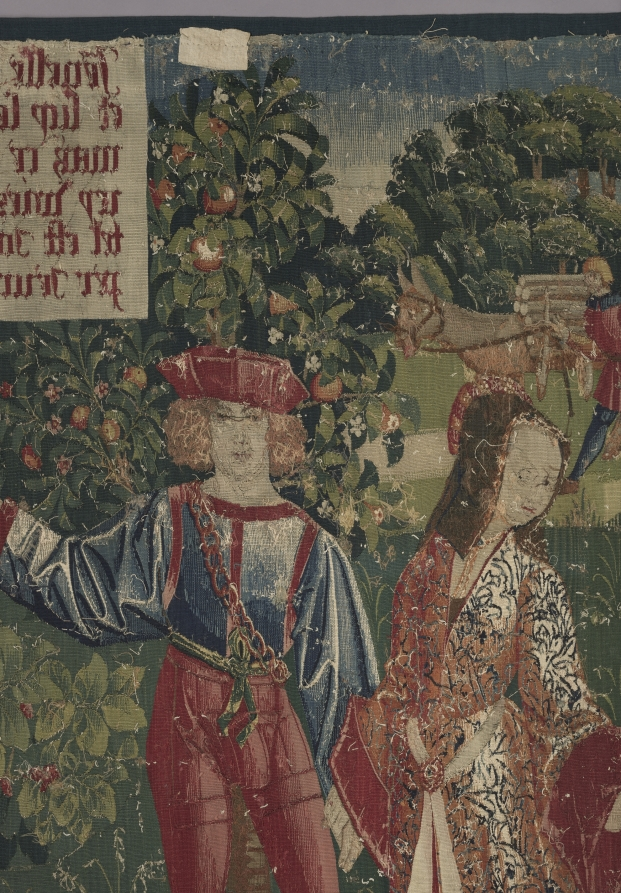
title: Youth (from Chateau de Chaumont set)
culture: France, Lyon(?), early 16th century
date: 1512–15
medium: silk and wool; tapestry weave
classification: Tapestry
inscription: French verse in Gothic letters translates as follows: Youth triumphs while its heart is healthy, And when it seems to hold all in its hand. But this triumph is without eternity. Here one sees the example full well: Those who are happy hide death in thier heart. Let the young heed this warning.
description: Louise of Savoy (1476-1531), queen mother of King Francis I, is depicted here in a sumptuous brocaded velvet in the center. She addresses youthful figures including Éléonore, Pierre Sala’s daughter who is facing her future husband, Hector. On the right, King Louis XII (died 1514) stands in front of the Chateau Langais where he had married Anne of Brittany. Above is Hector’s deceased father with a partially concealed skull under his robe, while a woman expresses surprise at the sight. The verse in Old French at the top states that youthful happiness is not eternal: Youth makes sounds as long as its heart is healthy, And thinks that it holds all in its hand. But this triumph is not eternal. Here you see clearly an example: He that is happy has death in his breast. Of this you people should take note.